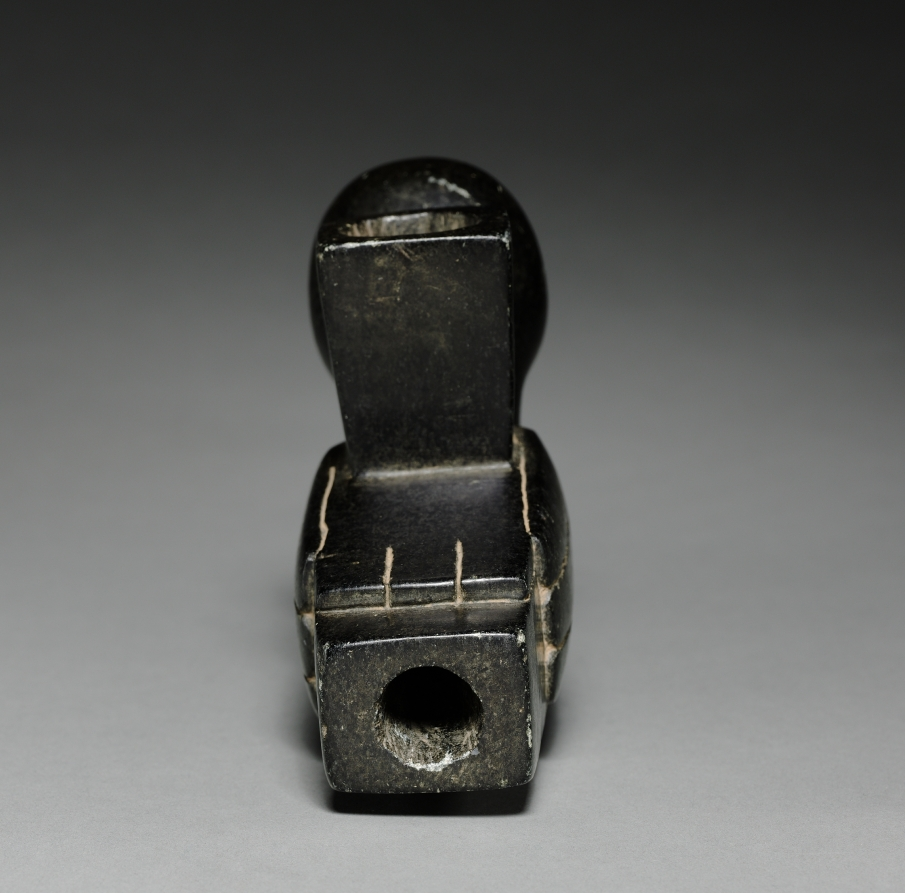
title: Pipe in the Form of an Owl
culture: America, North American Indian, Copena Culture (Tennessee area?)? or modern reproduction, Middle Woodland Period (100-600) or 20th century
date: 100–600 CE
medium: stone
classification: Sculpture